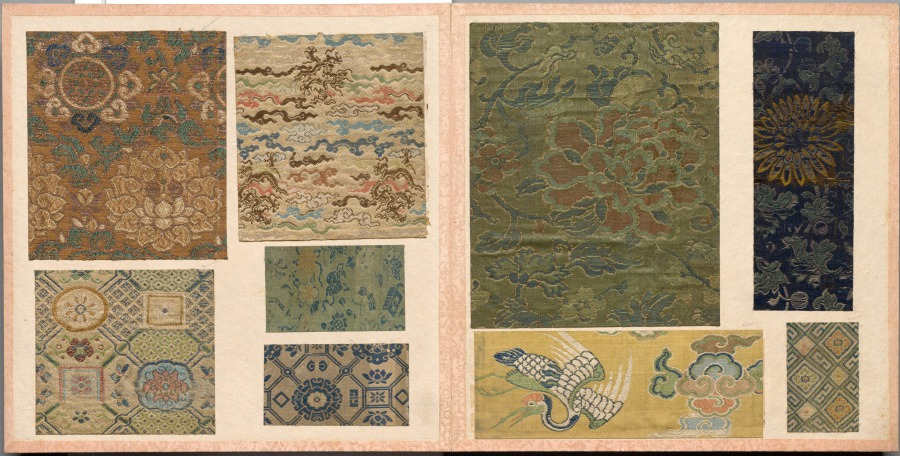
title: Album of Textile Samples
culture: Japan and China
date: 1700s–1800s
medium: silk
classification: Textile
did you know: This album contains 46 pages with 156 mounted Chinese or Japanese textile samples.